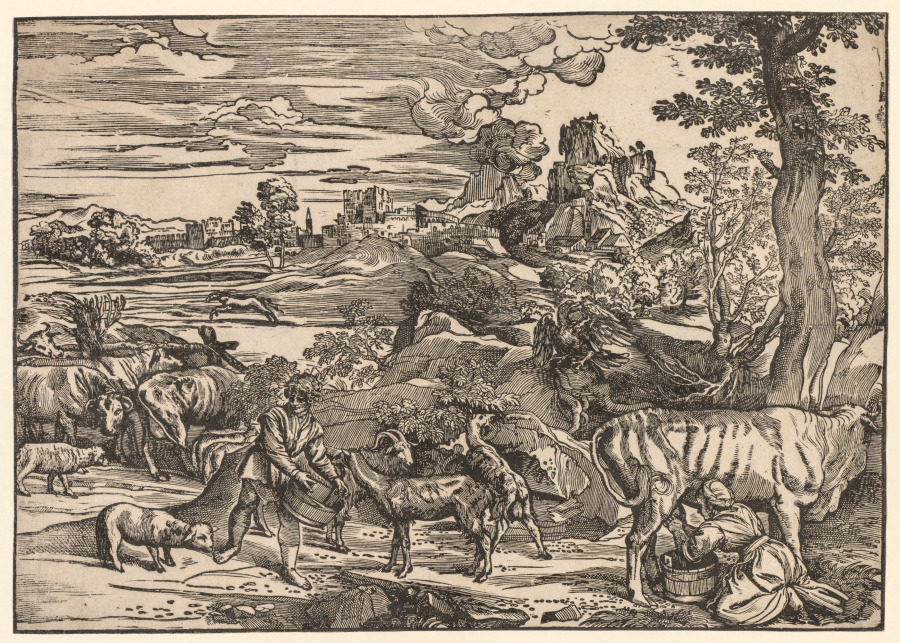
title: Landscape with a Milkmaid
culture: Italy, 16th century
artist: Niccolo Boldrini (Italian, c. 1500–after 1566)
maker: after Titian (Italian, c. 1488–1576)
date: c. 1525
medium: woodcut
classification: Print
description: In the 1520s, Venetian painter Titian began to take landscape from the quiet pastorals of his predecessors to actively dramatic scenes, such as this one, in which nature seems a protagonist in a narrative. While some motifs—such as the eagle—suggest symbolic meaning, it is impossible to pin down a specific story. Titian worked with block cutter Niccolo Boldrini to translate his drawing into print, and the result captures the expressive vision of Titian’s works, with their variety of forms and textures and emphasis on dramatic, atmospheric light.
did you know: Milkmaids and shepherds such as those appearing in this print exemplified the idea of Arcadia, an idyllic realm of unspoiled nature inspired by Roman poet Virgil (70–19 BCE) and a popular concept in the Renaissance.